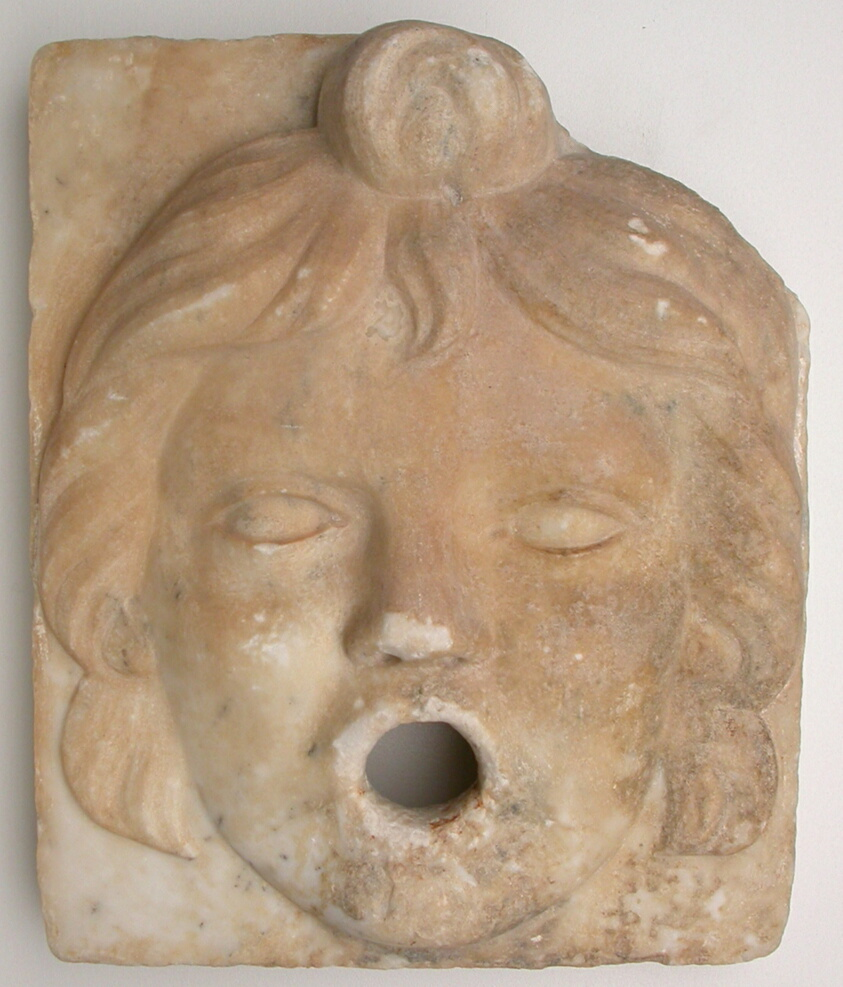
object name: Architectural fragment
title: Fountain Spout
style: roman (ancient, style or period), ancient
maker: Roman; Pompeii, Italy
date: 1st century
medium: Marble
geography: Pompeii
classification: marble; stone; sculpture; ancient art; architectural fragment